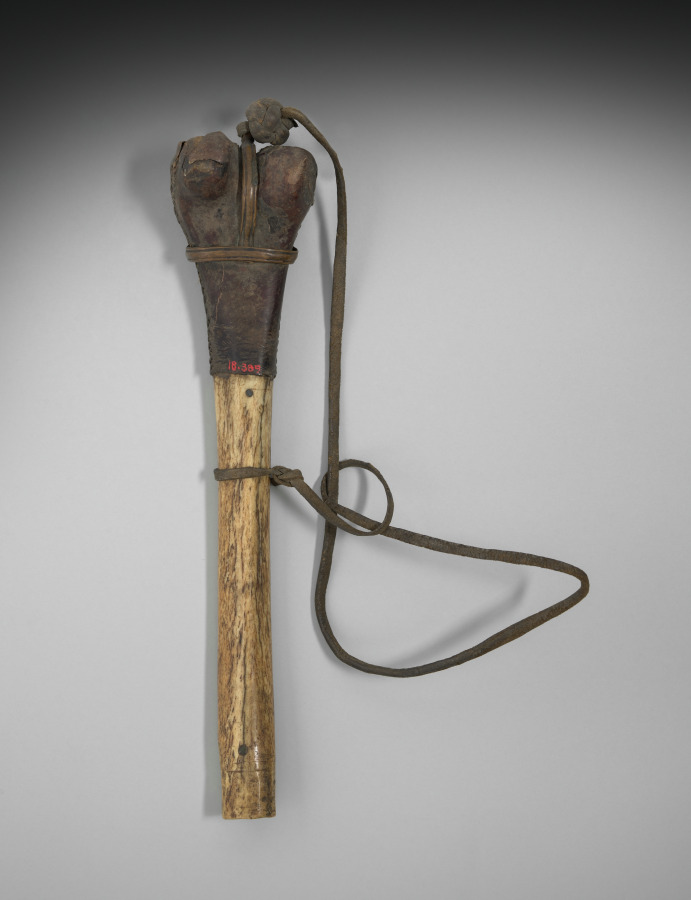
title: Thighbone Trumpet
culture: Tibet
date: c. 1800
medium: bone, leather, and copper alloy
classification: Musical Instrument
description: Blown during tantric Buddhist rituals, this ritual instrument is made of bone to remind practitioners of the impermanence of the corporeal body. The horn is sounded to clear away obstacles to enlightenment, conceived as enemies in battle.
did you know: Tantric ritual trumpets are traditionally made from human femurs, but now they can be made from plastic, metal, or other materials.